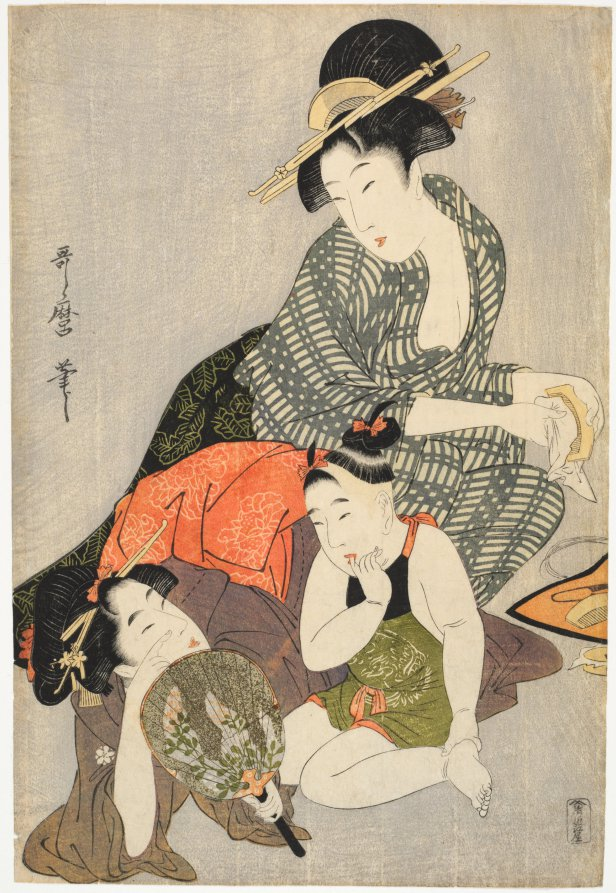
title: Cleaning Combs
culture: Japan, Edo period (1615–1868)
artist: Kitagawa Utamaro (Japanese, c. 1754–1806)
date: c. late 1790s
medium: color woodblock print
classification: Print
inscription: Artist's signature: Utamaro hitsu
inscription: Publisher: Ōmiya Gonkurō (Ōmiya, emblem)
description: In this print, a mother who has put up her child's hair into a neat bun cleans the comb. By the latter part of the Kansei era, or 1789-1801, Utamaro was frequently incorporating the activities of daily life into his images of beauties. Beyond serving as portraits, and depicting the bonds between mothers and children, the prints also take the view of a detached observer in their representations of everyday settings.